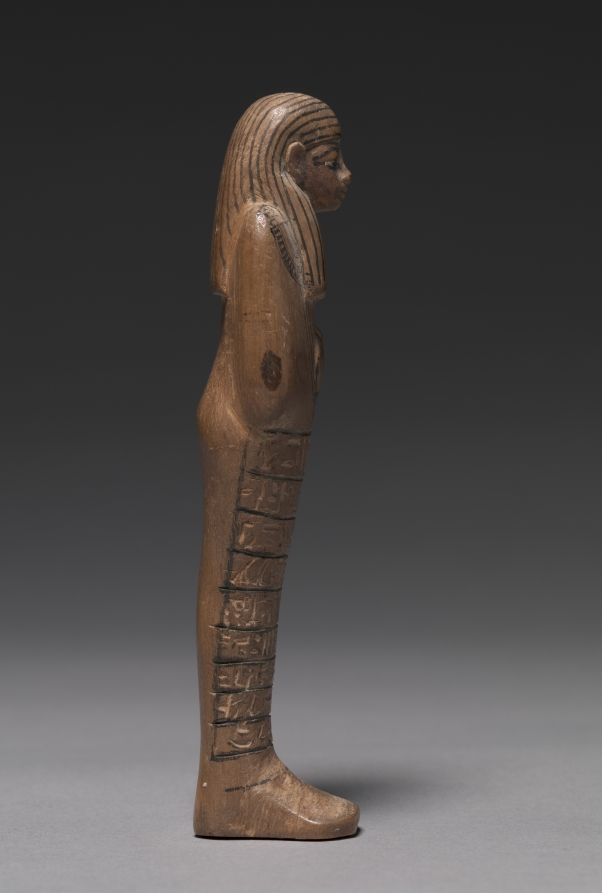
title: Shawabty of Tashery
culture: Egypt, New Kingdom (1540–1069 BCE), Dynasty 18, reign of Amenhotep III (1390–1352 BCE)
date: c. 1391–1353 BCE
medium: painted tamarisk?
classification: Funerary Equipment